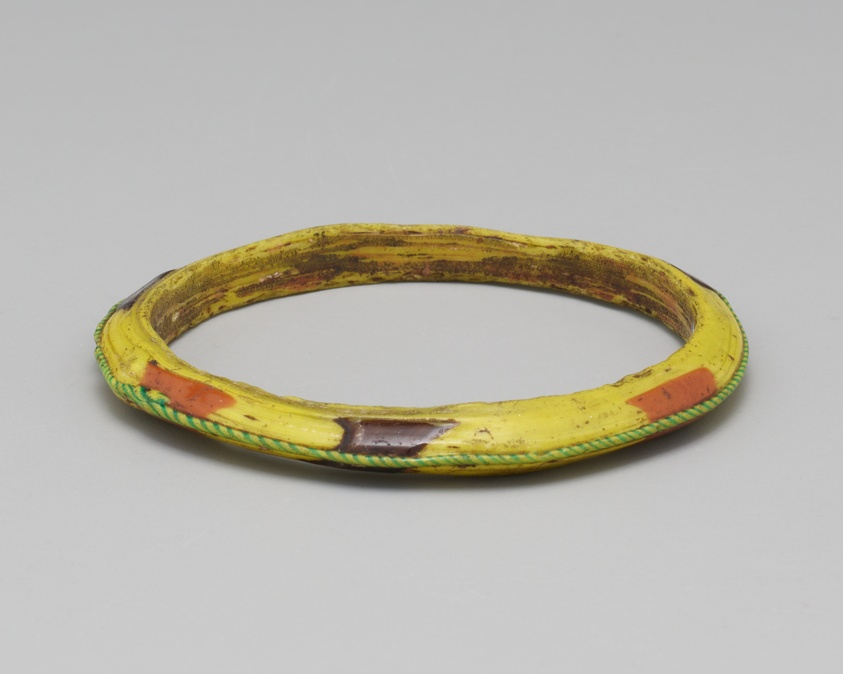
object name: Costume and Accessories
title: Bracelet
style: Islamic (culture or style)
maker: Islamic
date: 14th-15th century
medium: Glass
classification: glass; jewelry; ancient art; costume